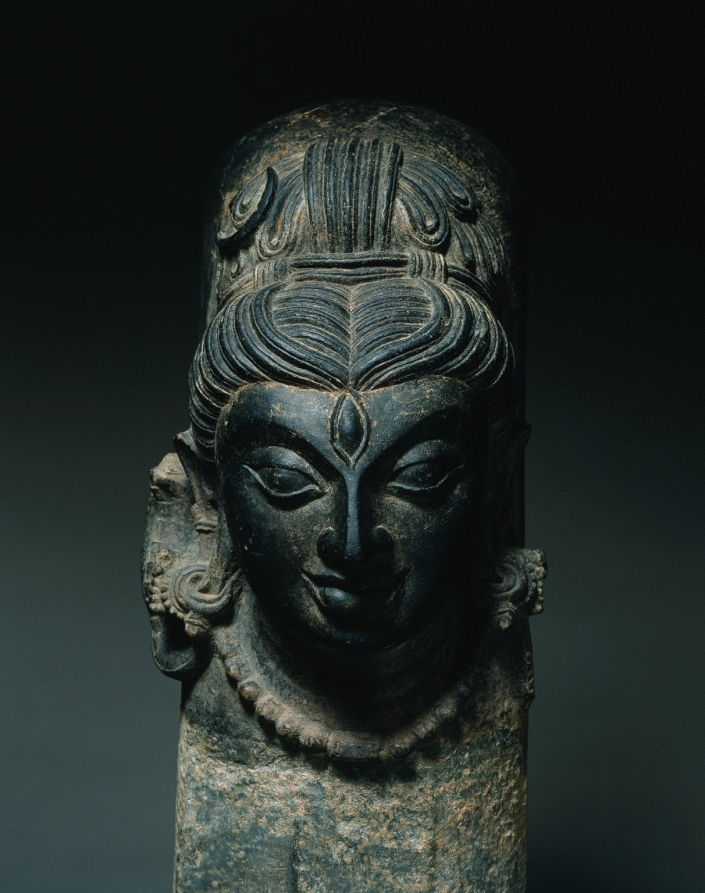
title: One-Faced Linga (Ekamukhalinga)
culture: Eastern India, Bihar, Medieval period, Pala dynasty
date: 600s–700s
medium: chloritic schist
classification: Sculpture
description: The innermost sanctum of a Hindu temple dedicated to Shiva is called a womb chamber in which a stylized phallus called a linga is installed. Together, the chamber and linga represent the potentiality of creation. Artists depict the first stage of creation by a face emerging from the phallus, which embodies one aspect of Shiva. This face is of a powerful yogi, with long matted locks adorned with a crescent moon. He has a penetrating gaze with all three of his eyes. This icon would have been accessed primarily by Brahmin priests who would perform rituals honoring Shiva as the ultimate creator of the world.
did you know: Some lingas have four faces that indicate a more advanced stage of creation.